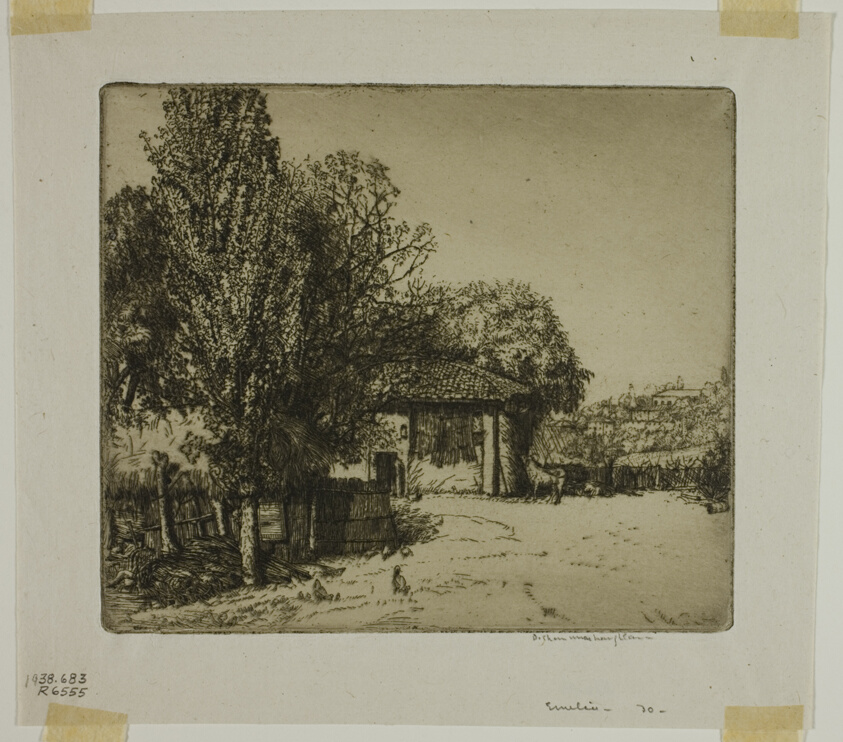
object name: Print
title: Emelia, Italy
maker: Donald Shaw MacLaughlan (American, born Canada, 1876-1938)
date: 1904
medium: Etching in black on cream wove paper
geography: United States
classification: etching; print; prints and drawing